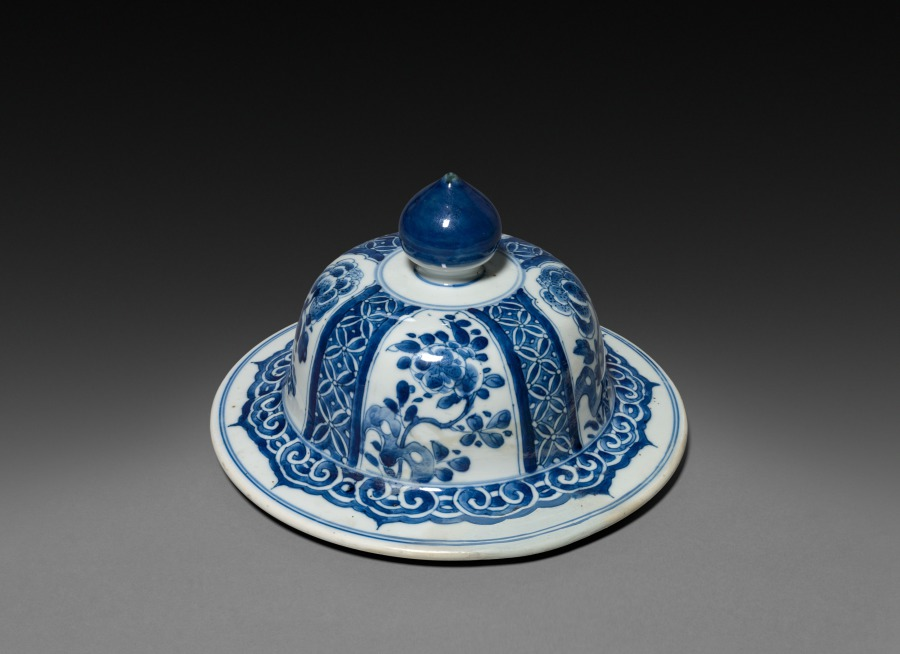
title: Vase with Cover (lid)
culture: China, Jiangxi province, Jingdezhen kilns, Qing dynasty (1644–1911), Kangxi reign (1662–1722)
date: 1662–1722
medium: porcelain with underglaze blue decoration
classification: Ceramic